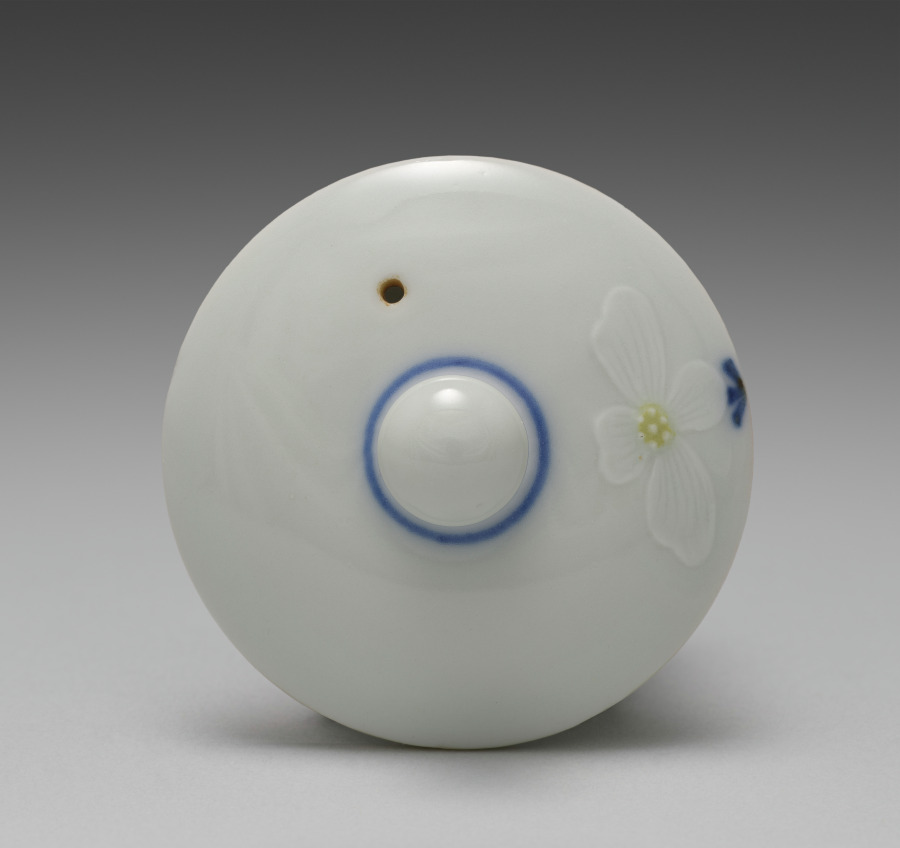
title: Lid for Teapot with Begonias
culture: Japan, Meiji period (1868–1912)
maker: Seifū Yohei III (Japanese, 1851–1914)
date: 1897–1914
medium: Porcelain with underglaze and overglaze colors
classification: Ceramic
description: This teapot has complex surface treatment: a design of begonias in modulated underglaze blue for the leaves and stems as well as thick overglaze white with incised lines to define the petals, plus small areas of underglaze yellow at their low-relief centers. A band of underglaze blue gives further definition to the lid’s handle, and the area just above the base has a double band of blue above a row of snail-shell curls. Unlike many other teapots, which have marks on their bases, this one has “Seifu” incised into one of its sides in relatively large characters. It is the side that would face the host if the teapot were held by the handle with the right hand, which would be the expectation.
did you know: This teapot with begonias combines underglaze blue with subtle use of yellow and white enamels.